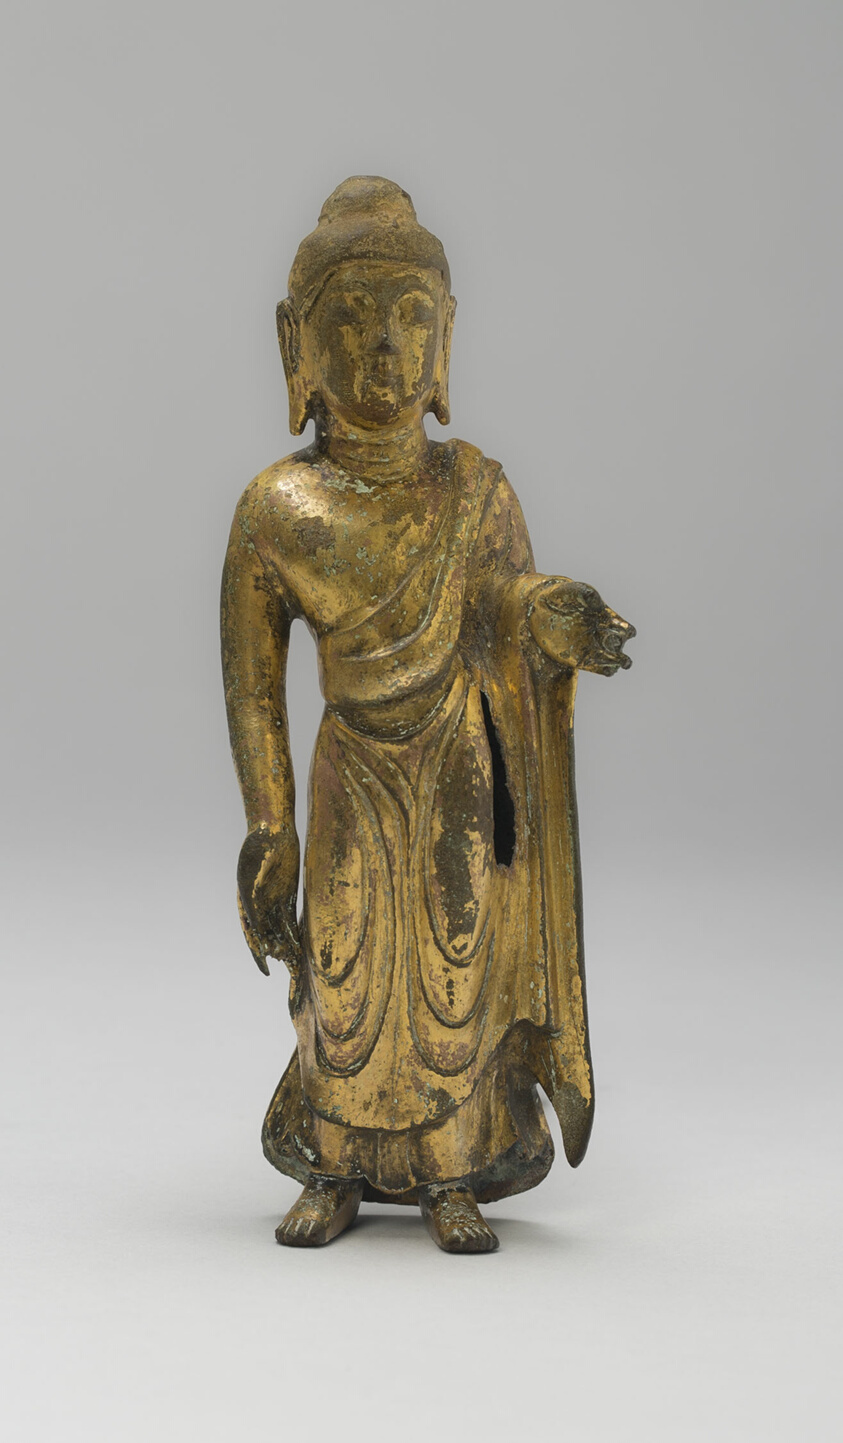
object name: Sculpture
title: Standing Buddha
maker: Korea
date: Unified Silla (676-935), 8th–10th century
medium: Gilt bronze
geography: Korea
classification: bronze; metal; sculpture; asian art